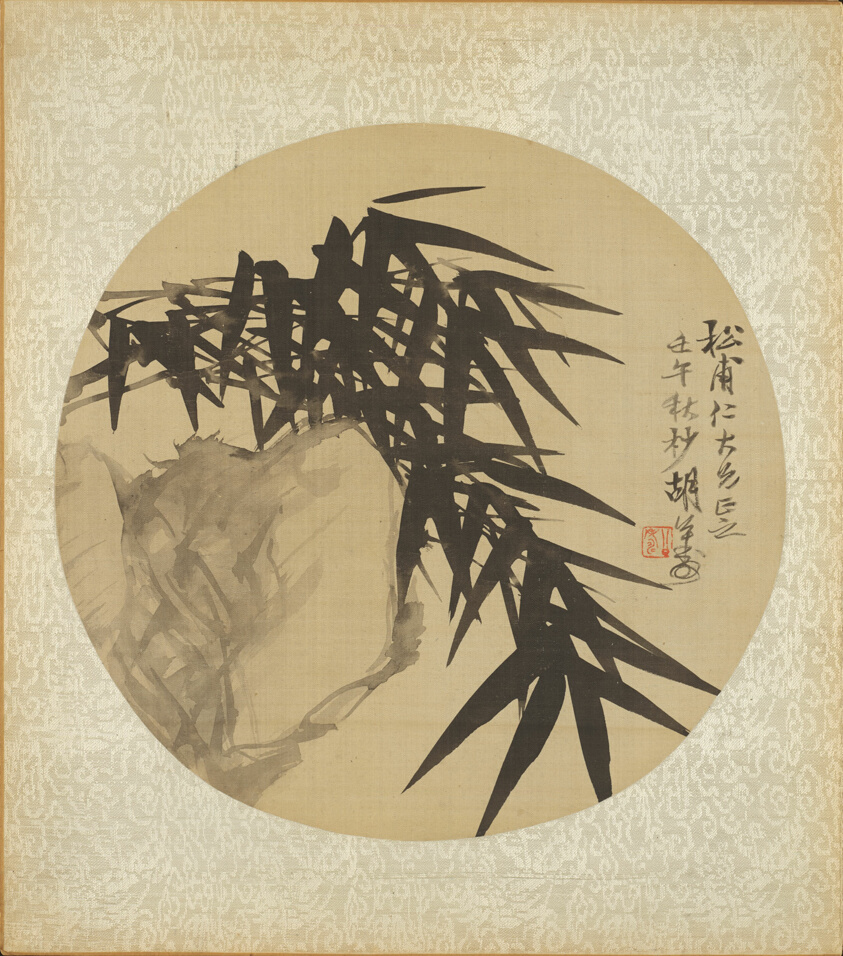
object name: Painting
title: One of Sixteen Album Leaves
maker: Hu Gongshou 胡公壽 (Chinese, 1823-1886)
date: Qing dynasty (1644–1911), dated 1882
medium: Album leaf; ink on silk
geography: China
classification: album leaf; asian art; painting